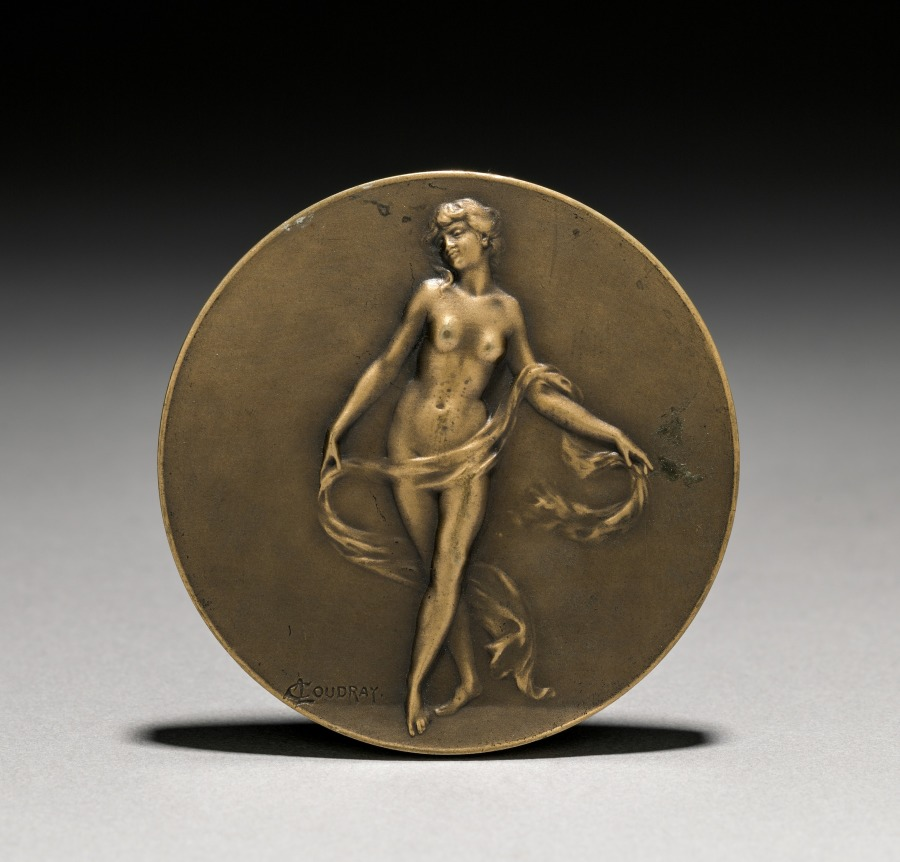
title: Medallion, "Dancing Nude"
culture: France, 19th century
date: 1800's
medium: bronze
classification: Metalwork